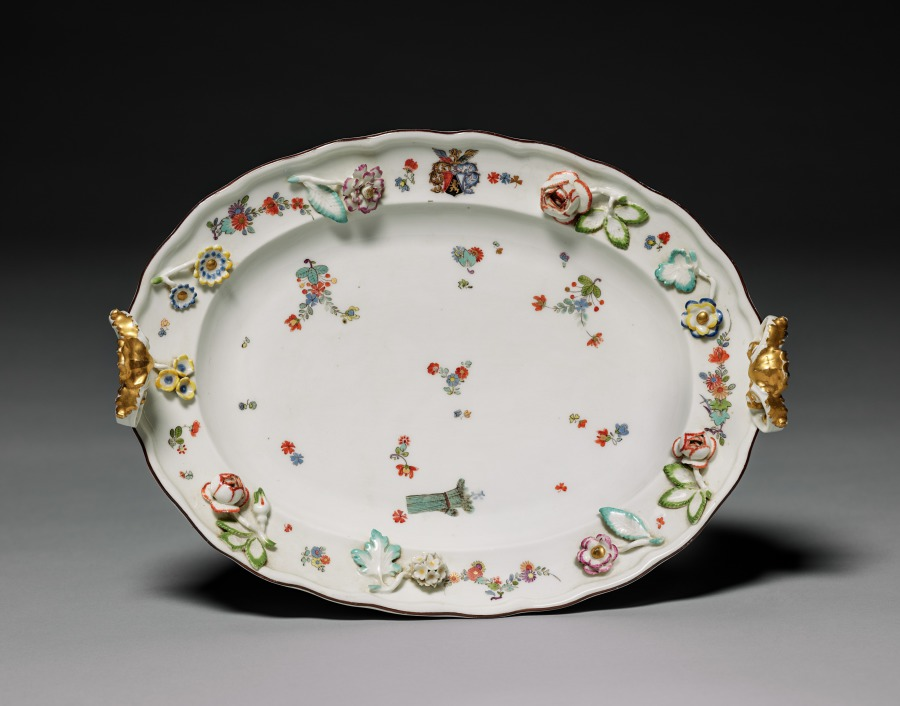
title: Tray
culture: Germany, Meissen, 18th century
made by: Meissen Porcelain Factory (German, est. c. 1710)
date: c. 1740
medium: porcelain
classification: Ceramic